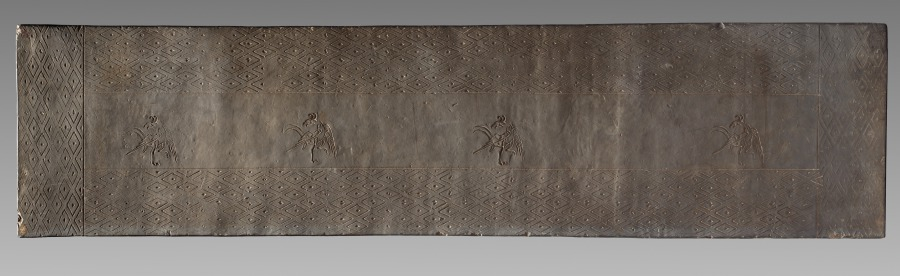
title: Tomb Tile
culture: China, Henan province, Jincun, Eastern Zhou dynasty (770–256 BCE)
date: 771–256 BCE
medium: earthenware with stamped decoration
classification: Ceramic